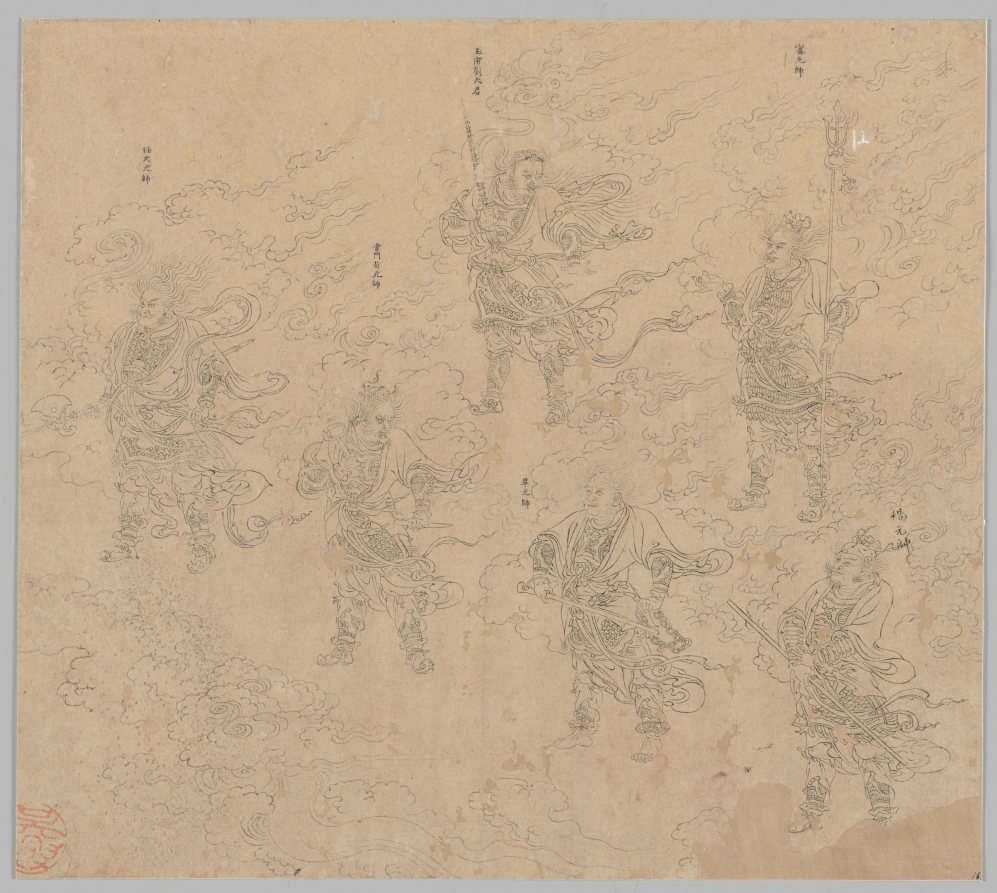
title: Album of Daoist and Buddhist Themes: Procession of Daoist Deities: Leaf 16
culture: China, Southern Song dynasty (1127-1279)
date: 1200s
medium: Album, ink on paper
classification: Painting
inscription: 楊元帥; 甯元帥; 畢元帥;玉府劉天君; 雷門苟元帥; 任大元帥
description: The upper most figure in the center of the composition is the Heavenly Lord Liu Hou 劉後. He is accompanied by five Field Marshals of the Daoist pantheon dressed in military garb are, from right to left, Yang Biao 楊滮, Ning Shikua 甯世夸, Bi Zongyuan 畢宗遠, Gou Leiji 苟雷吉, and Ren 任.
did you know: The inscription identifying the Field Marshal on the lower right was written in larger, more casual calligraphy than any other in the album.